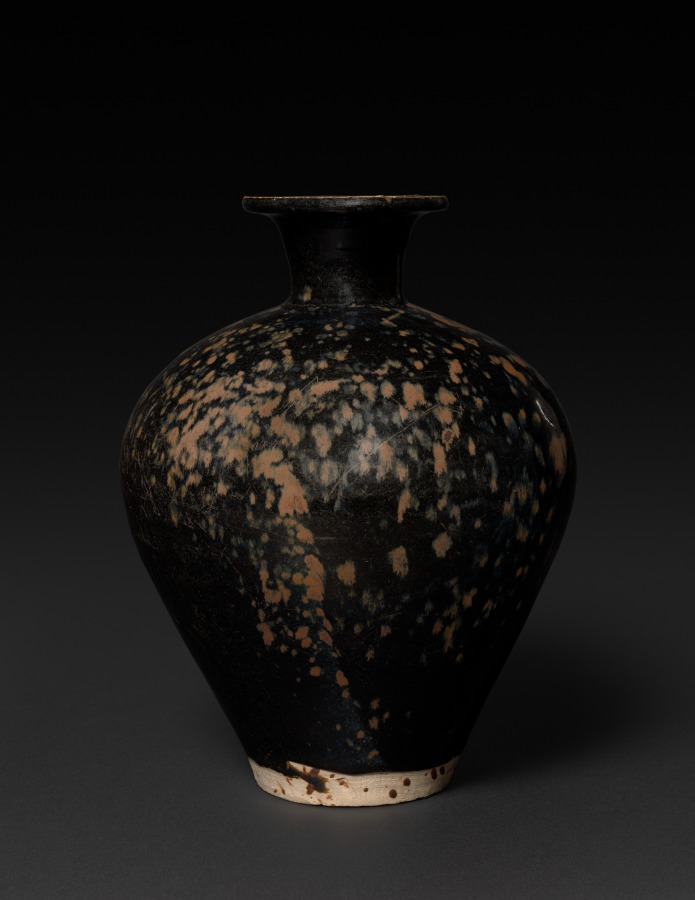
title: Vase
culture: China, Northern Song dynasty (960-1127)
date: 1000s–1100s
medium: glazed stoneware with underglaze iron decoration, Northern Black ware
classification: Ceramic